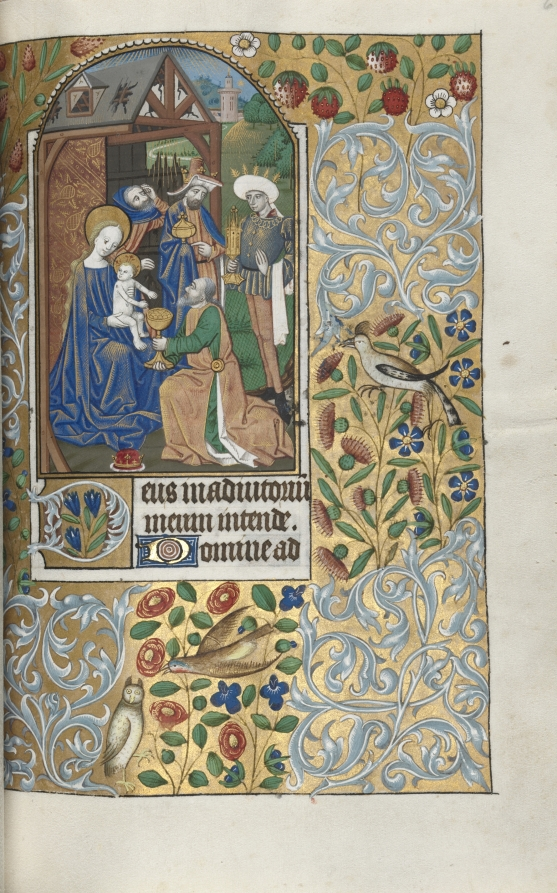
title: Book of Hours (Use of Rouen): fol. 64r, Opening of Sext, Adoration of the Magi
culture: France, Rouen, 15th century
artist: Master of the Geneva Latini (French, active Rouen, 1460–80)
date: c. 1470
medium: ink, tempera, and gold on vellum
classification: Bound Volume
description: In the late 1400s and early 1500s Rouen was an established and important center of book production. The city’s cathedral had a wealthy chapter that spent large sums of money to commission books and to maintain its extensive library. The stationers and booksellers would have likely been concentrated in or near the cathedral precinct. This artist, named after a manuscript now in Geneva, was Rouen’s principal illuminator during the second half of the 1400s.